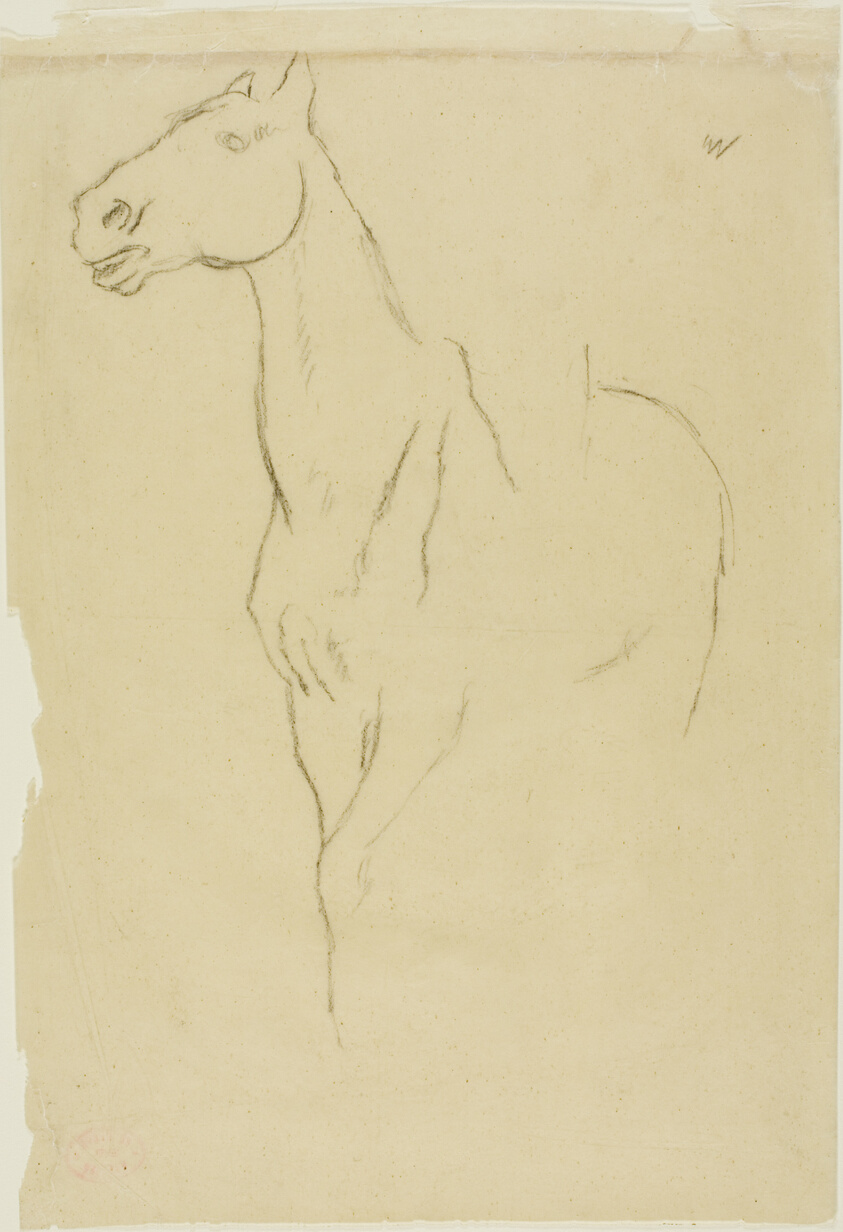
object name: Drawing and Watercolor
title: Horse Turned Three-Quarters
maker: Edgar Degas; French, 1834-1917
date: c. 1880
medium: Black crayon on buff tracing paper, formerly laid down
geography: France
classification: crayon; drawings (visual works); prints and drawing; paper